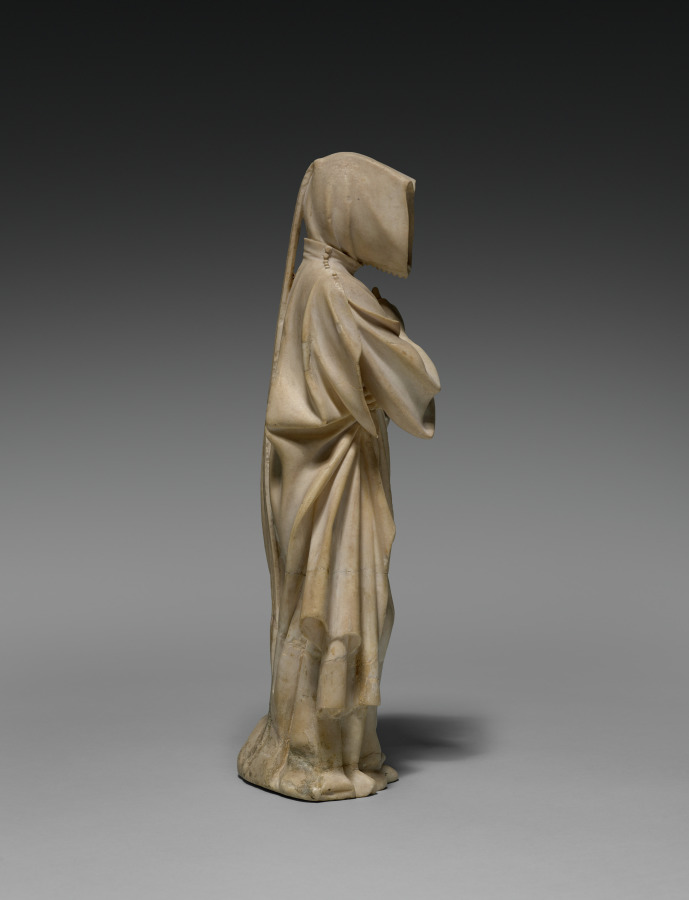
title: Mourner from the Tomb of Philip the Bold, Duke of Burgundy (1364–1404)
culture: Netherlands, active Dijon, 15th century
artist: Claus de Werve (Netherlandish, 1380–1439)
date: 1404–10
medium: vizille alabaster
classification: Sculpture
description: This figure comes from the tomb of Duke Philip the Bold from the church of Champmol near Dijon (Burgundy, France). Philip, who founded the monastery and designated it as his burial place, hired the best artists, many of whom came from the Netherlands. While the commission was given in 1381, the work was not completed until 1410, six years after the duke’s death. This mourner is unusual for the time because it is not carved as a static low relief on the pedestal of the tomb but interacts with the viewers and their fellow procession members. The lifelike quality of the figure is due in large part to the alabaster. Its softness allowed artists to carve details into the material, and the transparent, milky white stone could also be polished to a high gloss.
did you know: A plaster cast of this mourner decorates the empty niche in the Tomb of Philip the Bold in Dijon, France.